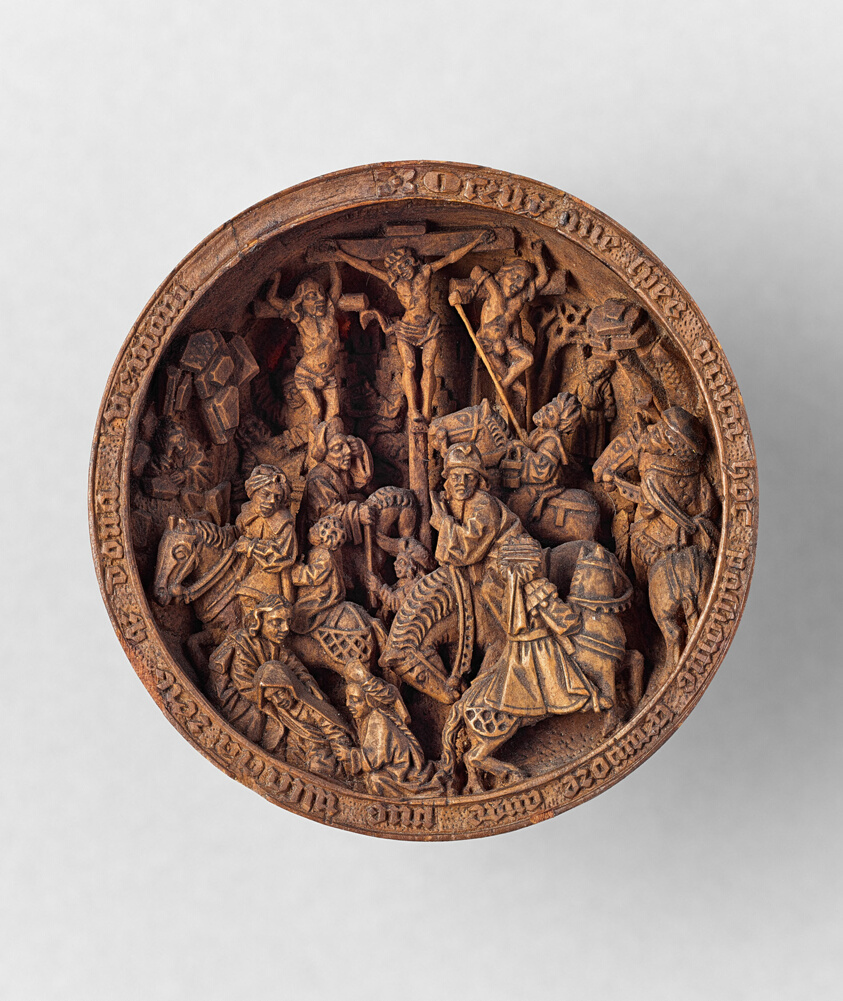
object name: Sculpture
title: Crucifixion Relief from a Rosary Bead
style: sixteenth century, 16th Century, Flemish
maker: Flemish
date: 1500/25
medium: Boxwood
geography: Flanders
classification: functional object; sculpture; bead; flemish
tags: crucifixions, animals, armor, Christian subjects, Christianity, death, figures, horse, horses, Jesus, men, people, religion, religious, religious figures, religious scenes, soldiers, women